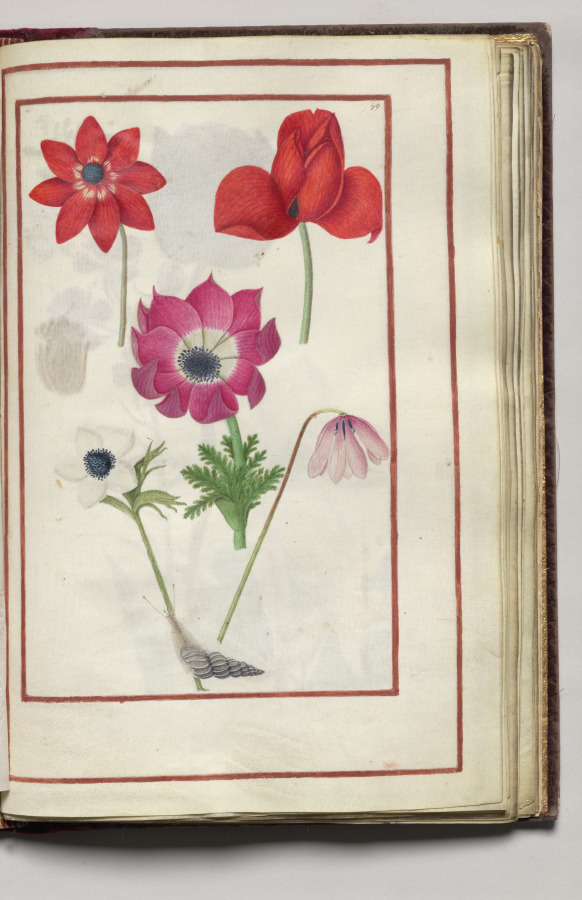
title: Anemones with a Snail, folio 30 (recto), from Florilegium (A Book of Flower Studies)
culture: France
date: 1608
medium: watercolor, ink, silver, and gold over occasional traces of pencil, on vellum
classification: Bound Volume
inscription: Dated: Poitiers 1608 (on frontispiece) Signed: On frontispiece in black ink, lower right: Van Kuyk Notation on drawing: Frontispiece: in pencil, lower margin: * élève de Van Kessel, peintre flammand (* in pencil also appears in front of Van Kuyk's name).